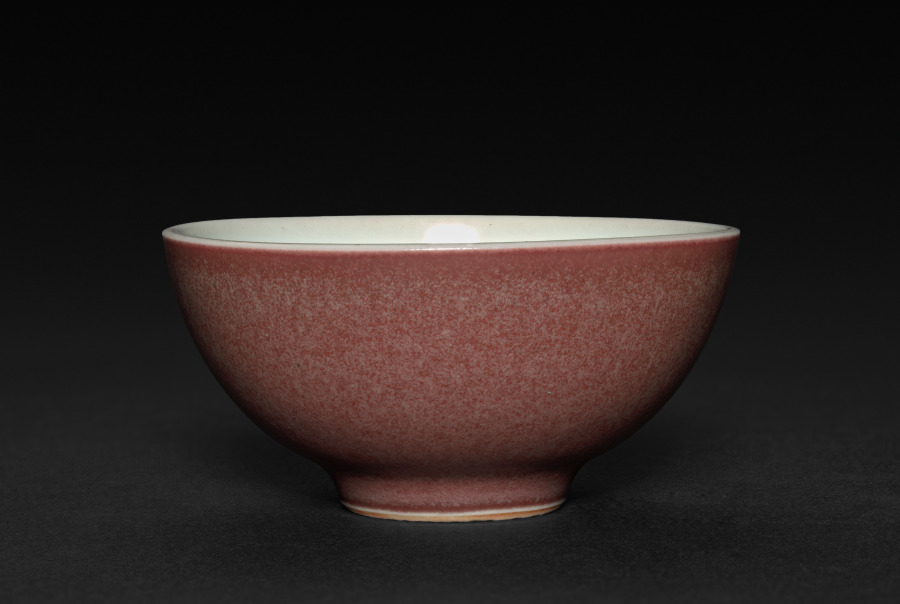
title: Cup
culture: China, Jiangxi province, Jingdezhen kilns, Qing dynasty (1644-1911)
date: 1700s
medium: porcelain with mottled blue glaze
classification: Ceramic